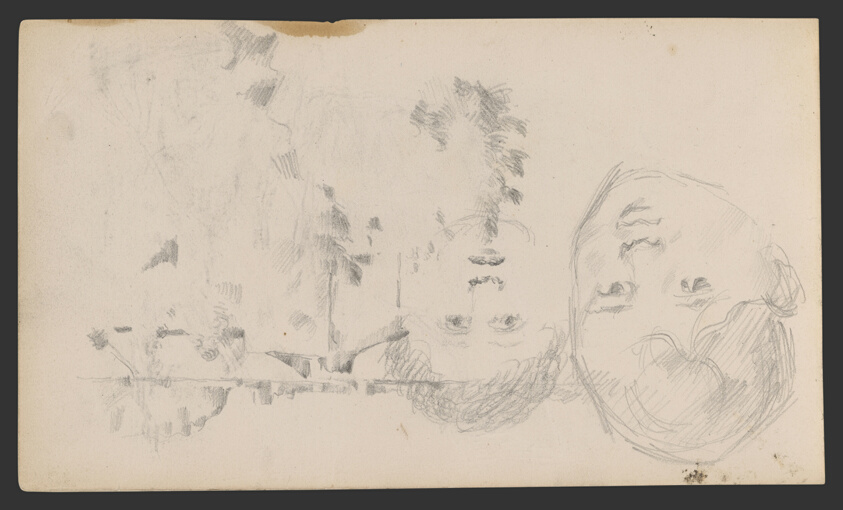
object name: Drawing and Watercolor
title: Sketchbook No. 2 (L'Estaque)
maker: Paul Cézanne; French, 1839-1906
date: 1875–86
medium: Graphite and pen and ink drawings on paper, bound into a book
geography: France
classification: sketchbook; graphite; prints and drawing; paper